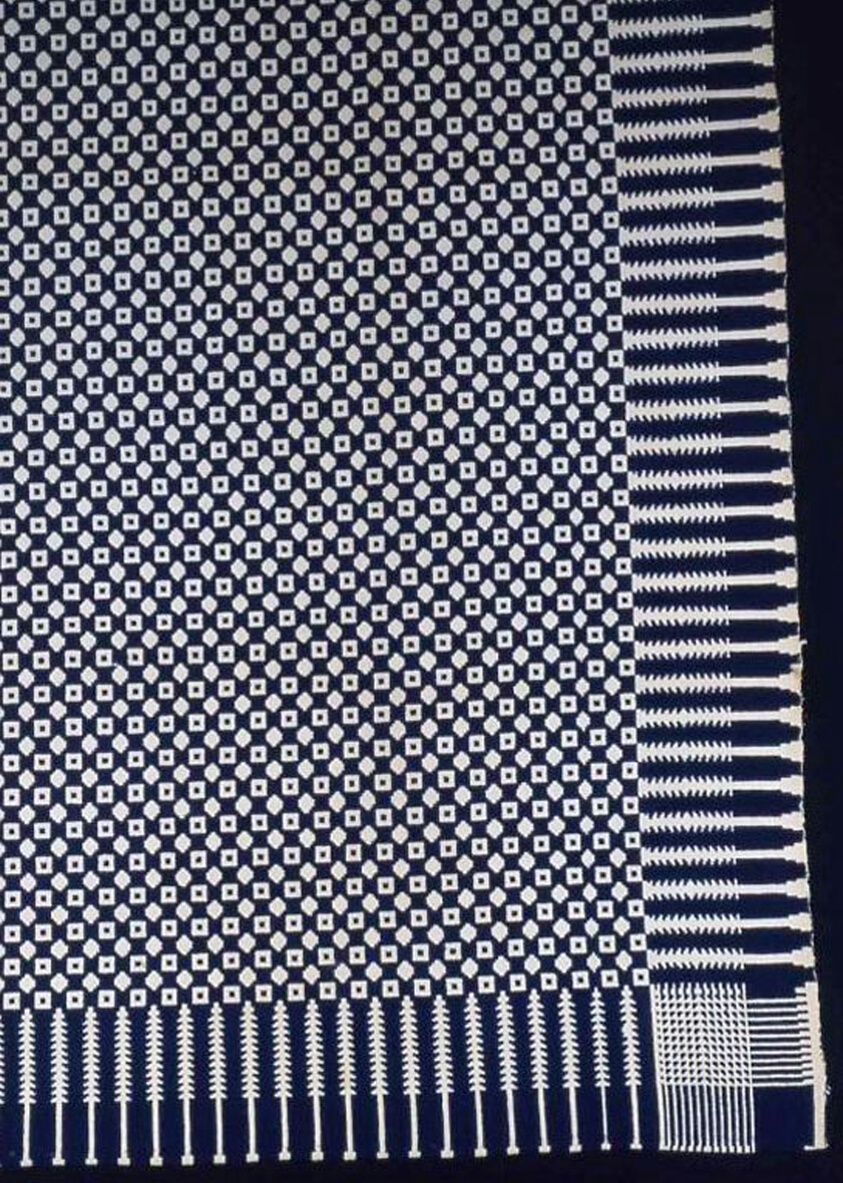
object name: Textile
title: Coverlet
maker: United States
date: 1820s/30s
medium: Cotton and wool, plain weave double cloth; two loom widths joined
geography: United States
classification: weaving - coverlet; coverlet; textile; weaving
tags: geometric motif, coverlet, pine trees, snowflake, squares, trees